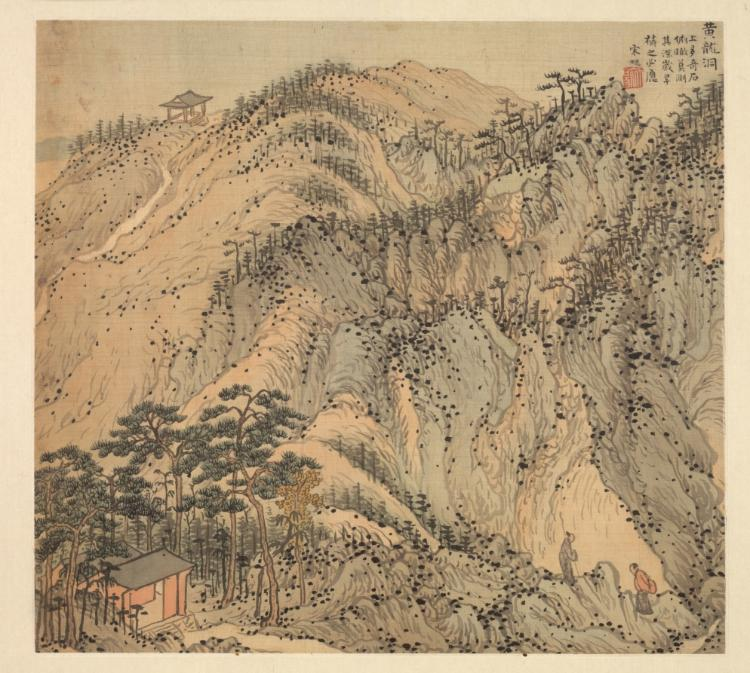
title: Huanglong Cave (Yellow Dragon Cave)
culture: China, Jiaxing, Ming dynasty (1368–1644)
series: Eighteen Views of Huzhou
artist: Song Xu (Chinese, 1525-c. 1606)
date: c. 1588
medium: Album leaf; ink and color on silk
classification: Painting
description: By the 1500s, visits to historic and scenic sites in the lower Yangzi delta stimulated an increase of printed illustrated travel books. Topographical depictions of local scenery flourished. Leaves from this album illustrates sites around Lake Tai of the two adjacent counties Changxing and Wuxing (modern Huzhou). Song Xu, who lived intermittently in Jiaxing and Songjiang, must have passed through Wuxing by boat and thus knew the region. The paintings are inscribed with gazetteerlike notations, suggesting that the album was produced for clients as commemorative works, a travel guide, or for “armchair travel” (woyou) in one’s mind.